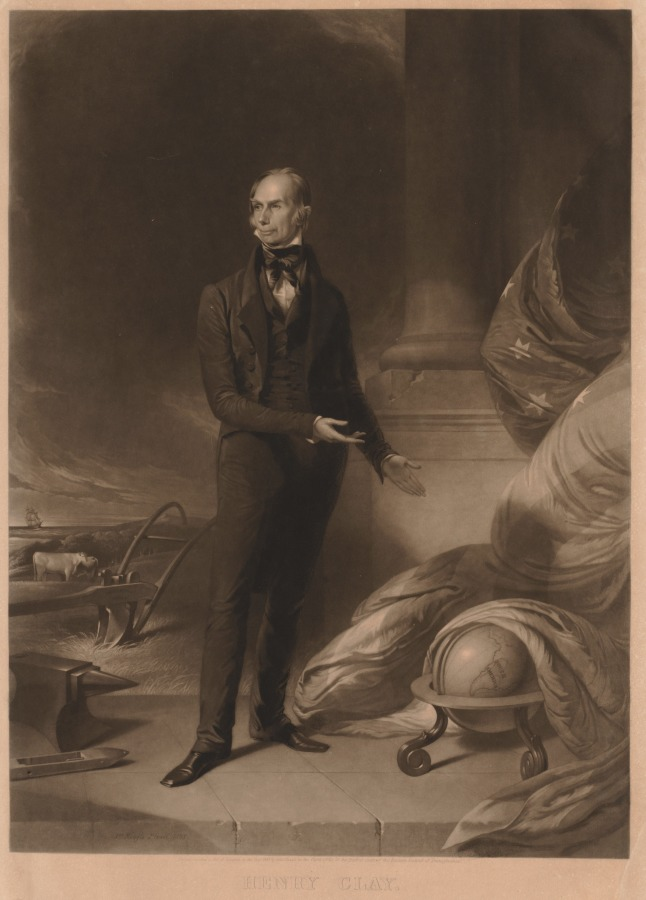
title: Henry Clay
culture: America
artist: William Sartain (American, 1843–1924)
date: 1843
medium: mezzotint with line engraving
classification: Print